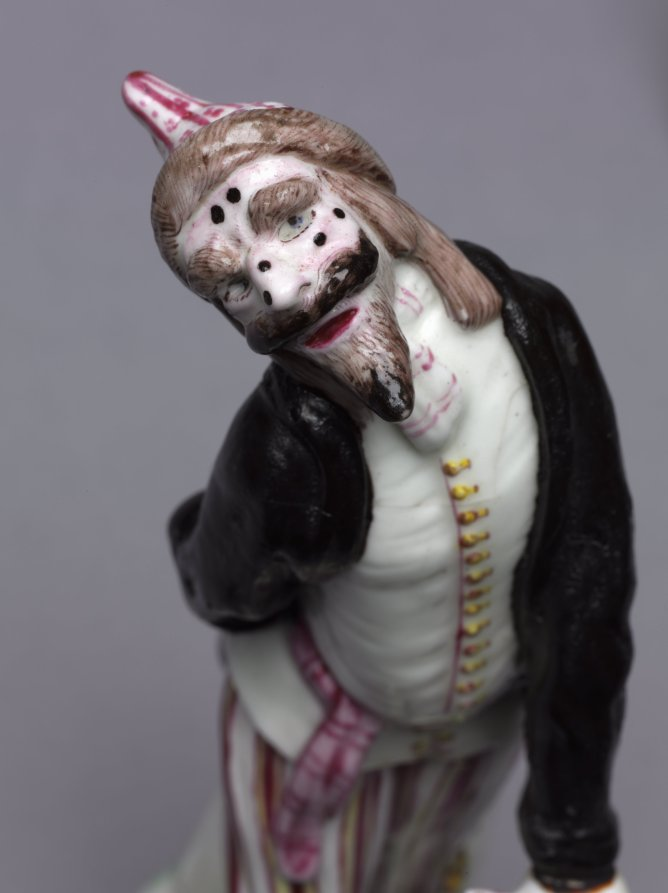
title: Figure of Pantalone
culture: France, Mennecy, 18th century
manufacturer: Mennecy Factory (French)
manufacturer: Mennecy- Villeroy Factory (French)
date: c. 1755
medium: soft-paste porcelain with enamel decoration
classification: Ceramic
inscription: Mennecy-Villeroy factory mark, incised on bottom: "DV"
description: The commedia dell’arte, a form of Italian improvisational theater, became widely popular in 18th-century Europe. This figure, with his prominent beard and distinguishing black robe, represents the character of elderly Venetian merchant Pantalone. Depicted in paintings and porcelain, the popularity of these figures demonstrated the influence of the theater on the tastes of the wealthy.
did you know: In the commedia dell’arte, Pantalone was known for his greed, lust, and buffoonery that made him the target of jokes.